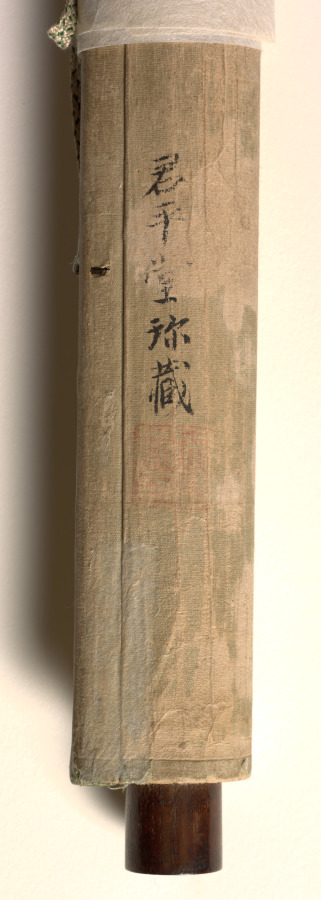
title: Landscape with Fishermen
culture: Korea, Joseon dynasty (1392–1910)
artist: attributed to Yi Bul-hae (Korean, active 1500s)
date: 1600s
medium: hanging scroll; ink and slight color on silk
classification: Painting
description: Clad in a straw rain poncho and wide-brimmed hat, a fisherman is seated in a small boat. Reeds sparkle on the far shoreline among dark, black rock forms that appear to float above the water. On the near shoreline are a pair of pines, a grove of bamboo or water reeds, and two withered deciduous trees from which moss hangs. This landscape painting, which emphasizes an intimate solitary moment through evoking various atmospheric elements—rain, evening light, and frosty air—was one of the main subjects of mid- and late 16th-century landscape paintings.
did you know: This landscape painting emphasizes an intimate solitary moment by evoking various atmospheric elements: rain, evening light, and frosty air.